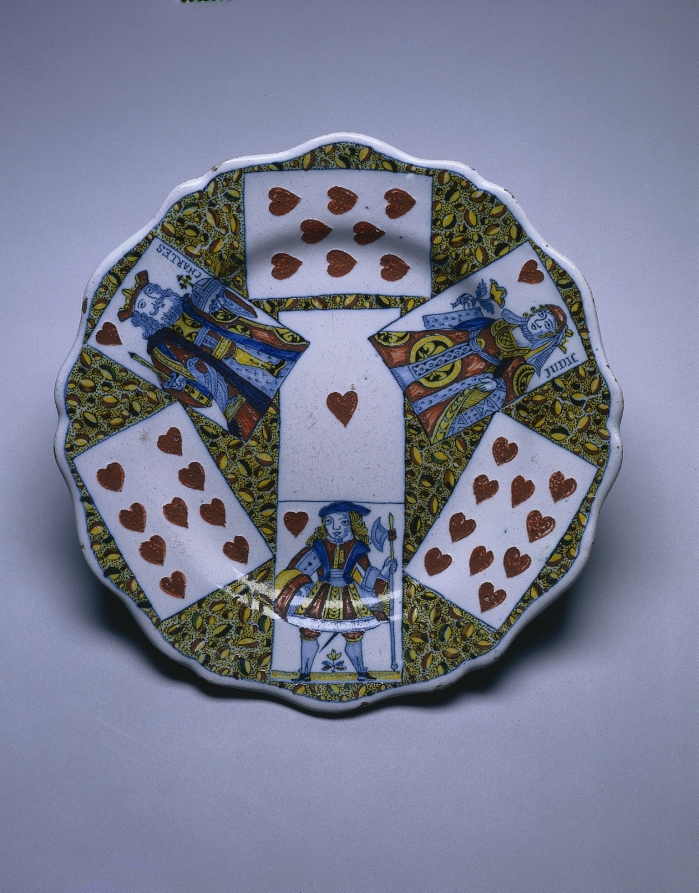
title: Plate with Playing Cards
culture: France, Lille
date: c. 1760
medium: faience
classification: Ceramic